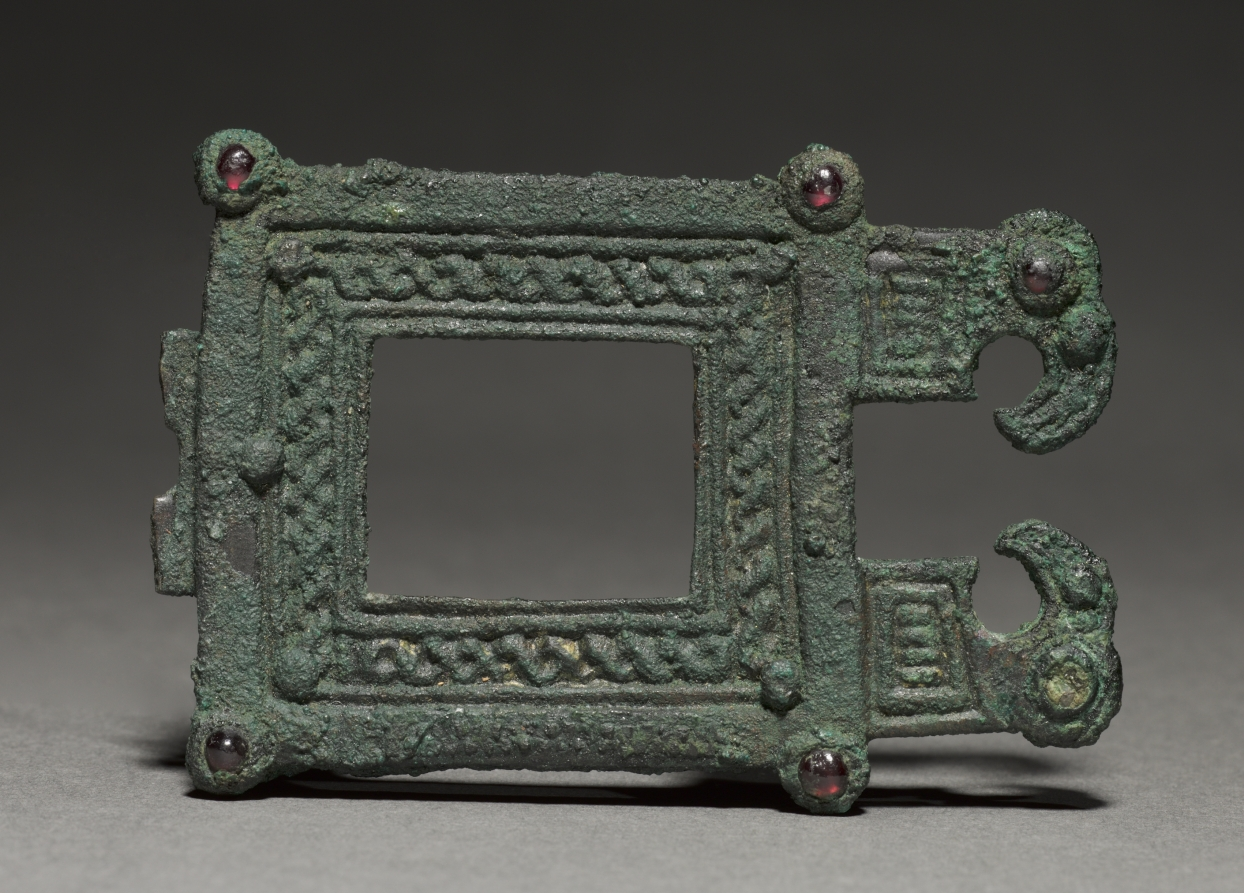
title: Buckle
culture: Ostrogothic, Migration period, 6th century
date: 500s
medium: bronze and garnets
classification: Jewelry